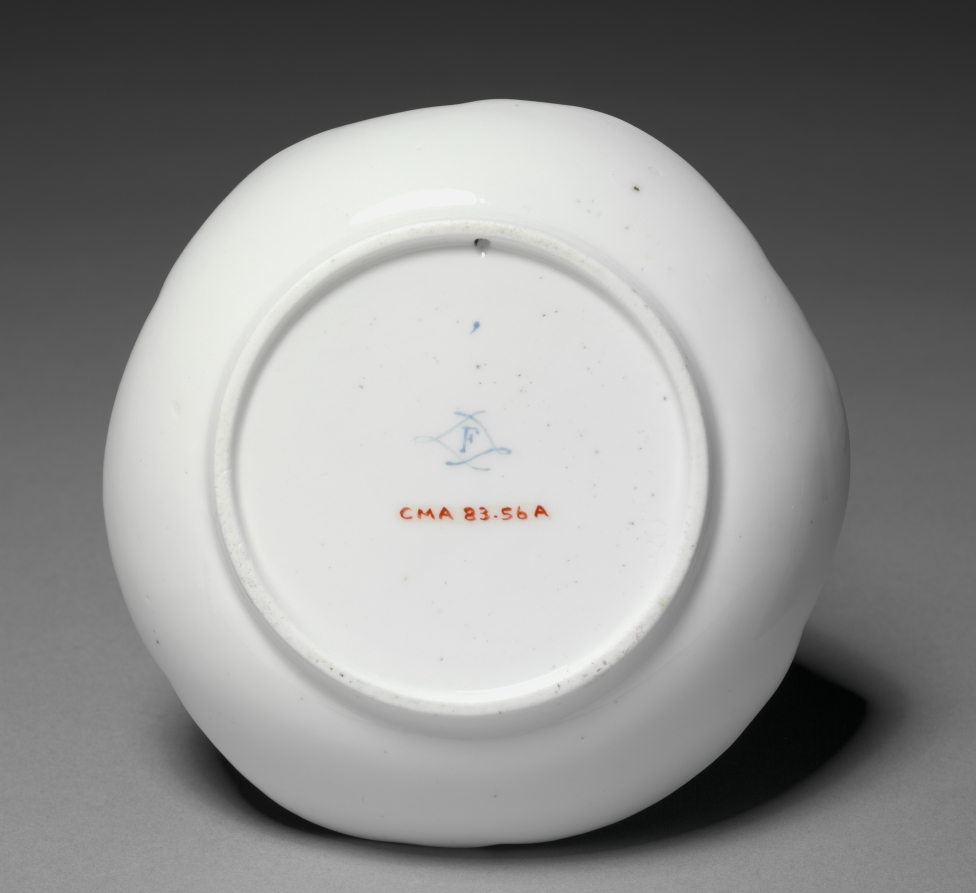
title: Saucer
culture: France, Sèvres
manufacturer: Sèvres Porcelain Factory (French, est. 1756)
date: 1758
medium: soft-paste porcelain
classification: Ceramic